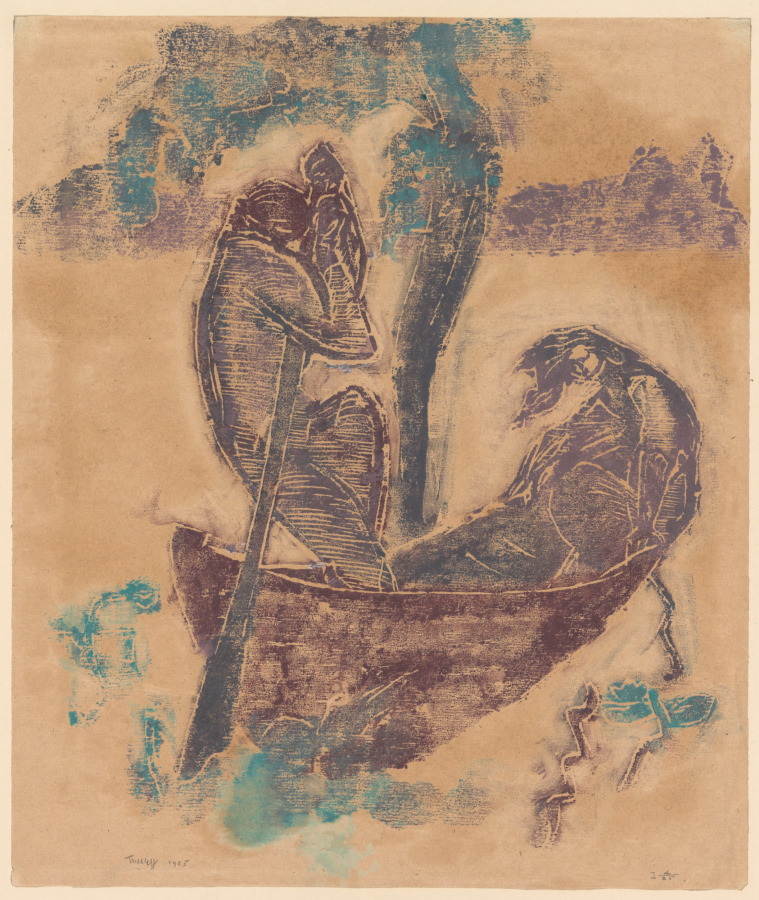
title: Boating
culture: Finland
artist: Ellen Thesleff (Finnish, 1869–1954)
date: 1925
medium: color woodcut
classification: Print